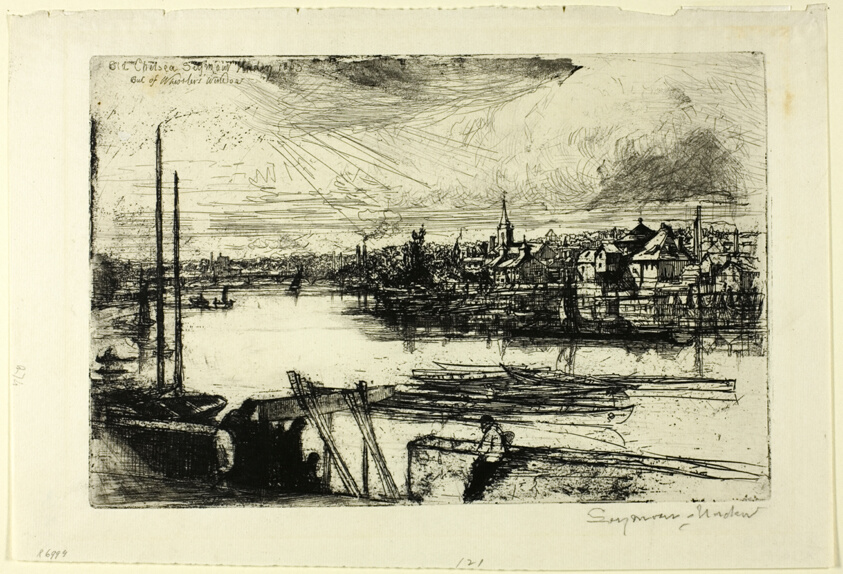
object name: Print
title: Battersea Reach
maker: Francis Seymour Haden (English, 1818-1910)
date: 1863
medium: Etching with drypoint on ivory laid paper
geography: England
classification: etching; print; prints and drawing